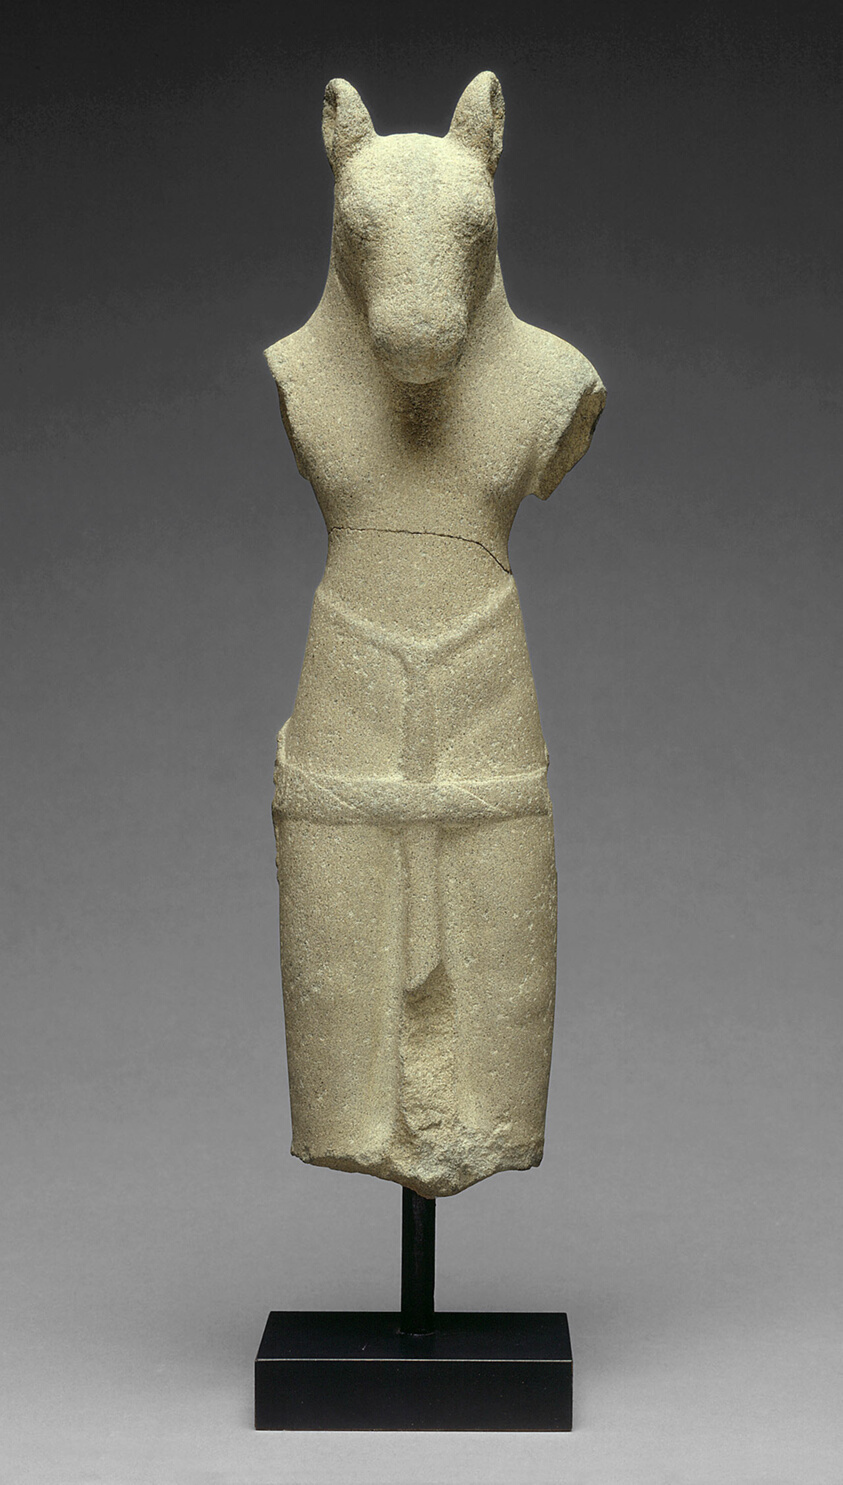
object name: Sculpture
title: Horse-Headed Incarnation of God Vishnu (Hayagriva)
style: Southeast Asian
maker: Cambodia or Vietnam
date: Pre–Angkor period, 7th/8th century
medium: Sandstone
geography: Cambodia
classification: sandstone; stone; sculpture; asian art